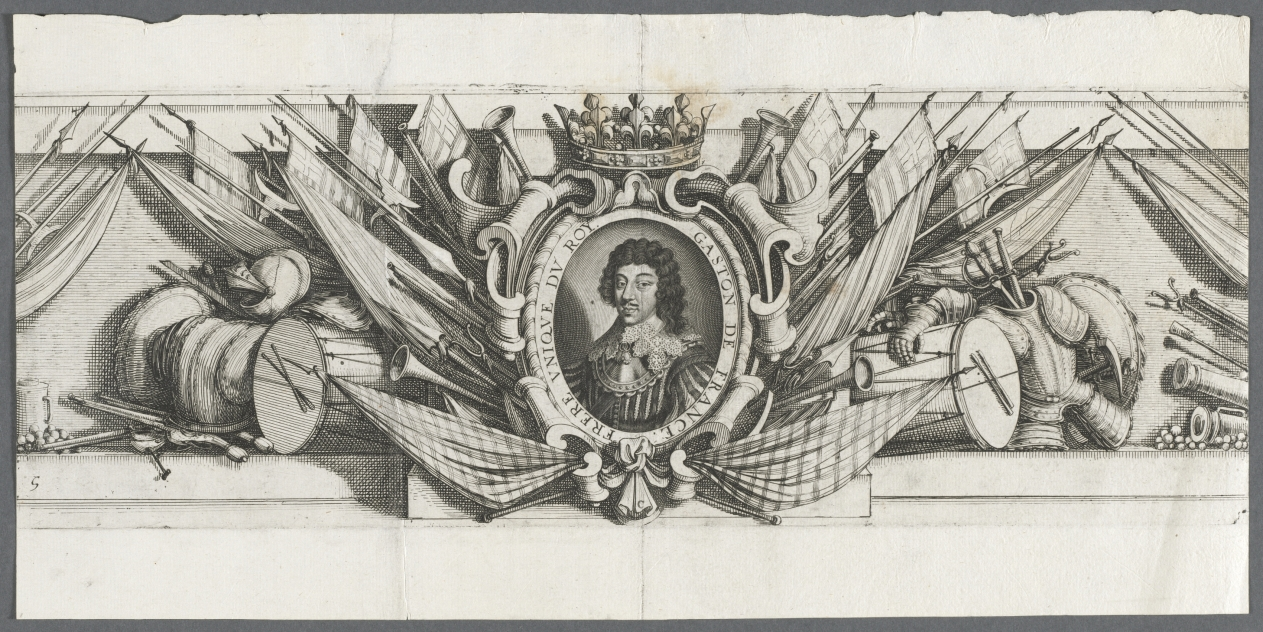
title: The Siege of La Rochelle: Plate 15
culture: France, 17th century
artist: Michael Lasne (French, 1590–1667)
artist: and Abraham Bosse (French, 1602–1676)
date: 1628–1630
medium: etching and engraving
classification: Print